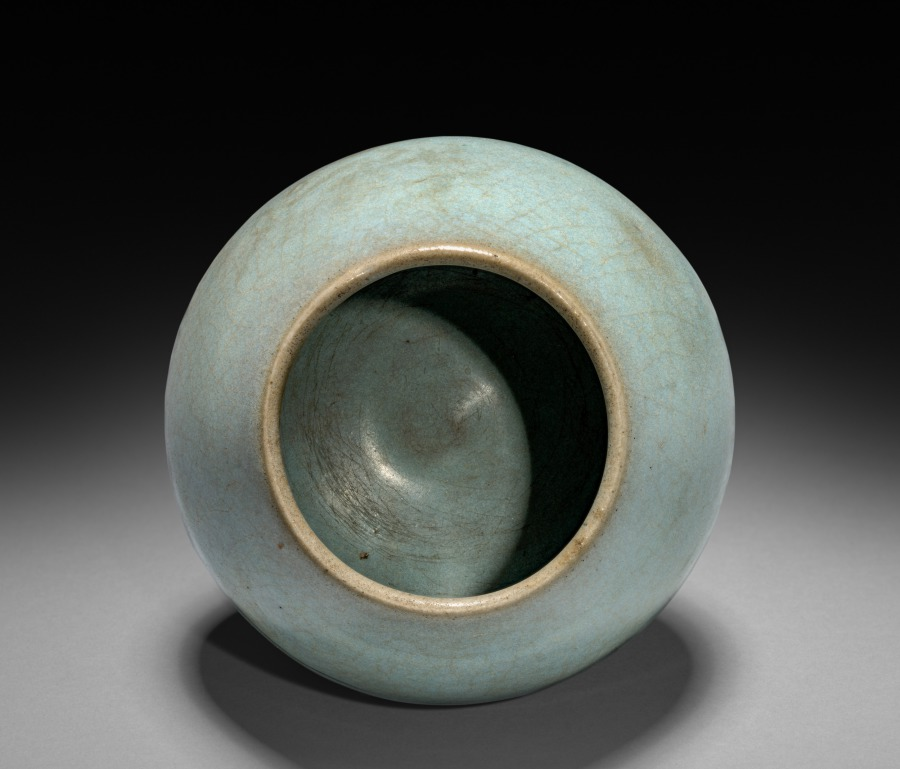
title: Lotus Bud Jar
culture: Northern China, Northern Song dynasty (960-1127) - Jin dynasty (1115-1234)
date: 1100s–1200s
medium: stoneware, Jun ware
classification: Ceramic